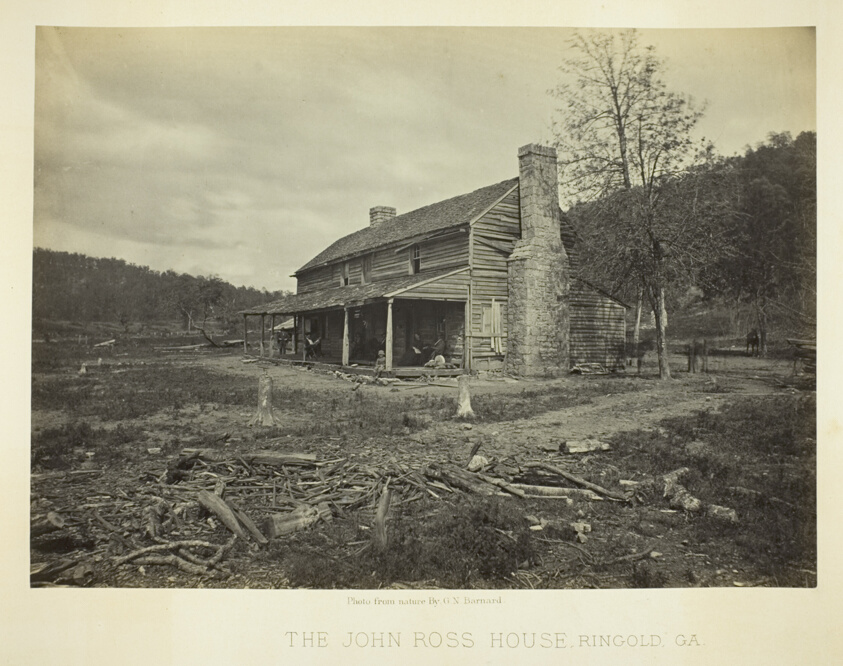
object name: Photograph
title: The John Ross House, Ringold, GA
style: 19th century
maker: George N. Barnard (American, 1819–1902)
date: 1866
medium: Albumen print, plate 16 from the album "Photographic Views of the Sherman Campaign" (1866)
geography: United States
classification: albumen silver print; photographic process; photography; photograph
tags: Collected by Hugh Edwards, Sherman's Campaign 1866